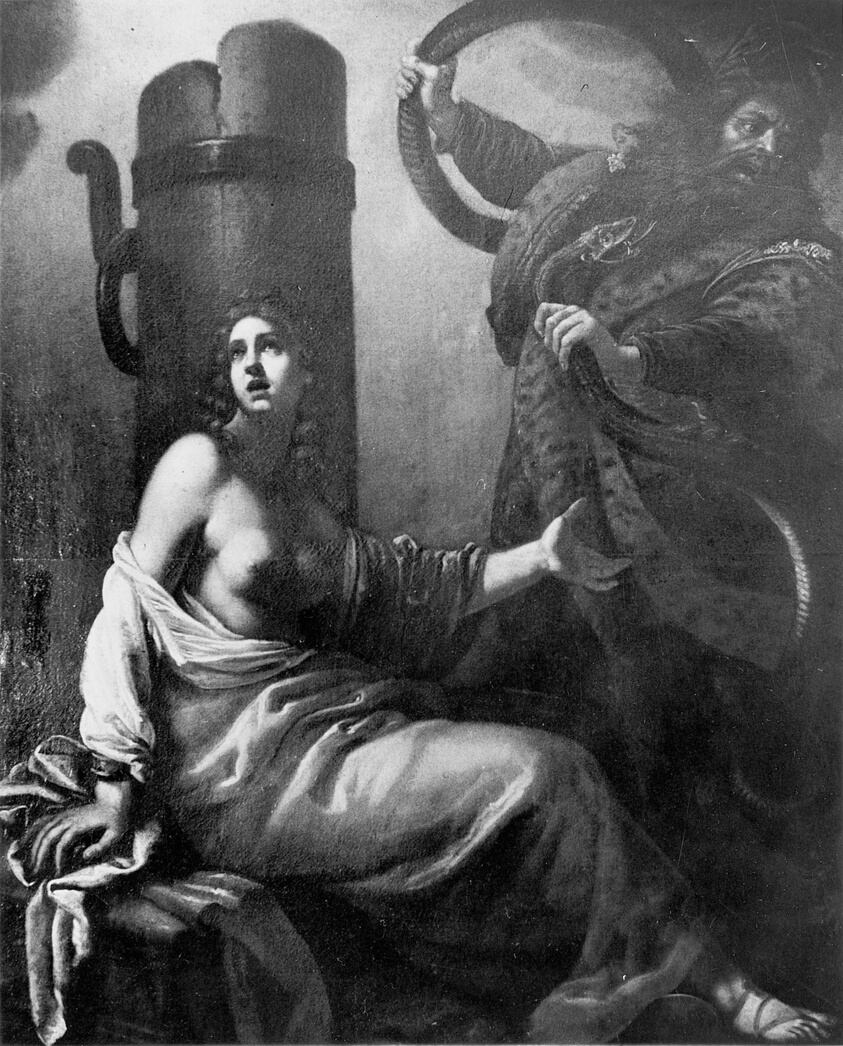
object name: Painting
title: Hercules and Hesione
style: 17th Century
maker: Attributed to Bartolomeo Salvestrini (Italian, died 1630)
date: c. 1630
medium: Oil on canvas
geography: Italy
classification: oil on canvas; paint; oil paintings (visual works); Italian; painting; european painting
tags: Greek mythology, woman, snake, nudes, mythology, mythical, monsters, man, Greek, Greece, danger, animals, mythological figures